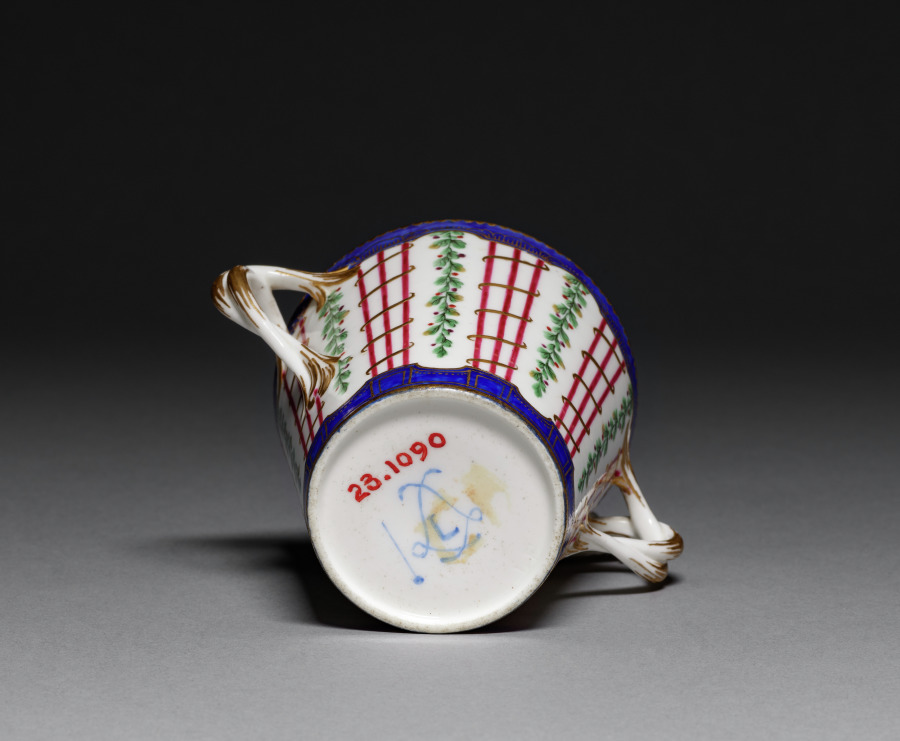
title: Cup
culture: France, Sèvres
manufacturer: Sèvres Porcelain Factory (French, est. 1756)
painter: Louis-Jean Thévenet pere (French, 1708-)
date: 1764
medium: soft-paste porcelain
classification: Ceramic